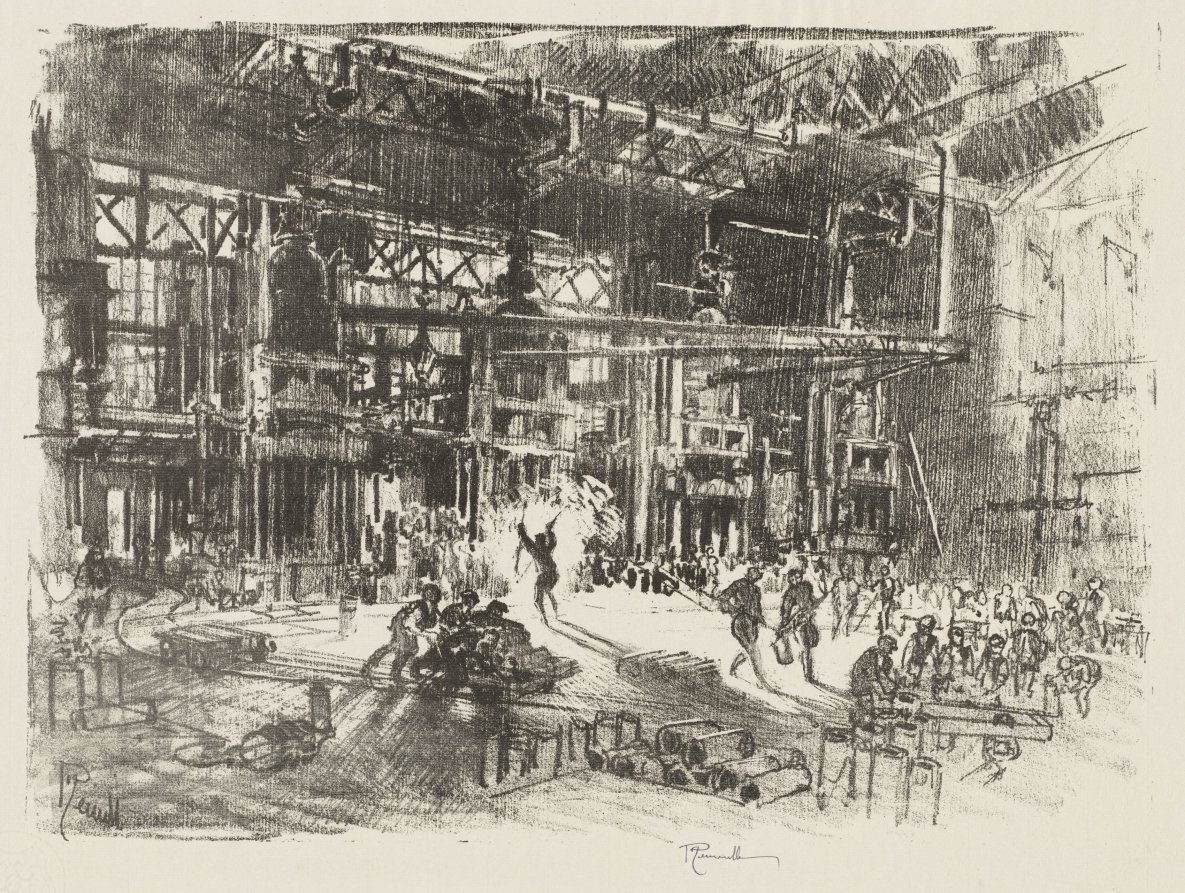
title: English War Work: The Presses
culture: America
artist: Joseph Pennell (American, 1857–1926)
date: 1916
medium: lithograph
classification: Print